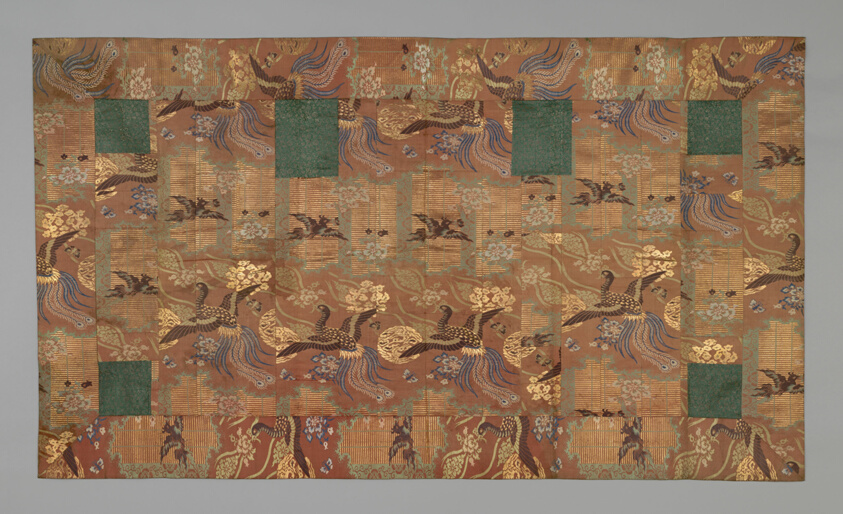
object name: Textile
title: Kesa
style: meiji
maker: Japan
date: Meiji period (1868–1912), late 19th century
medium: Silk and gold-leaf-over-lacquered-paper strips, warp-float faced 2:1 'Z' twill weave with 1:2 twill interlacings of secondary binding warps and supplementary patterning wefts; patches: silk and gold-leaf-over-lacquered-paper strips, warp-float faced 2:1 'Z' twill weave with 1:2 twill interlacings of secondary binding warps and supplementary patterning wefts; lined with cotton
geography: Japan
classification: textile; weaving; liturgical - buddhist; costume